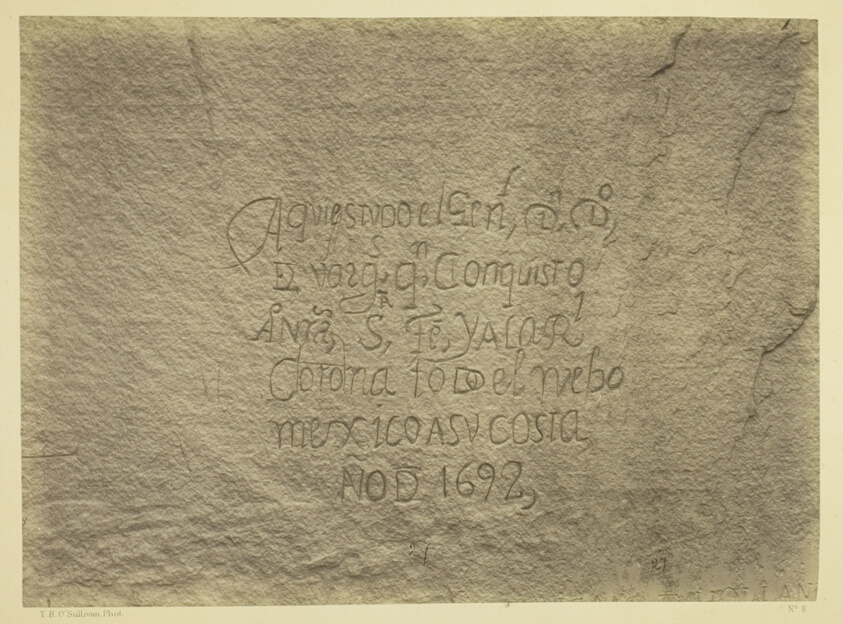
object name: Photograph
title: Historic Spanish Record of the Conquest, South Side of Inscription Rock, N.M. Geographical & Geological Explorations & Surveys West of the 100th Meridian. Expedition of 1873. -Lieut. Geo. M. Wheeler, Corps. of Engineers, Commanding.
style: 19th century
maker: Timothy O'Sullivan (American, born Ireland, 1840–1882)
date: 1873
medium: Albumen print, from the album "Geographical & Geological Explorations & Surveys West of the 100th Meridian," vol. 1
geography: United States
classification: albumen silver print; photographic process; photography; photograph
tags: Collected by Hugh Edwards